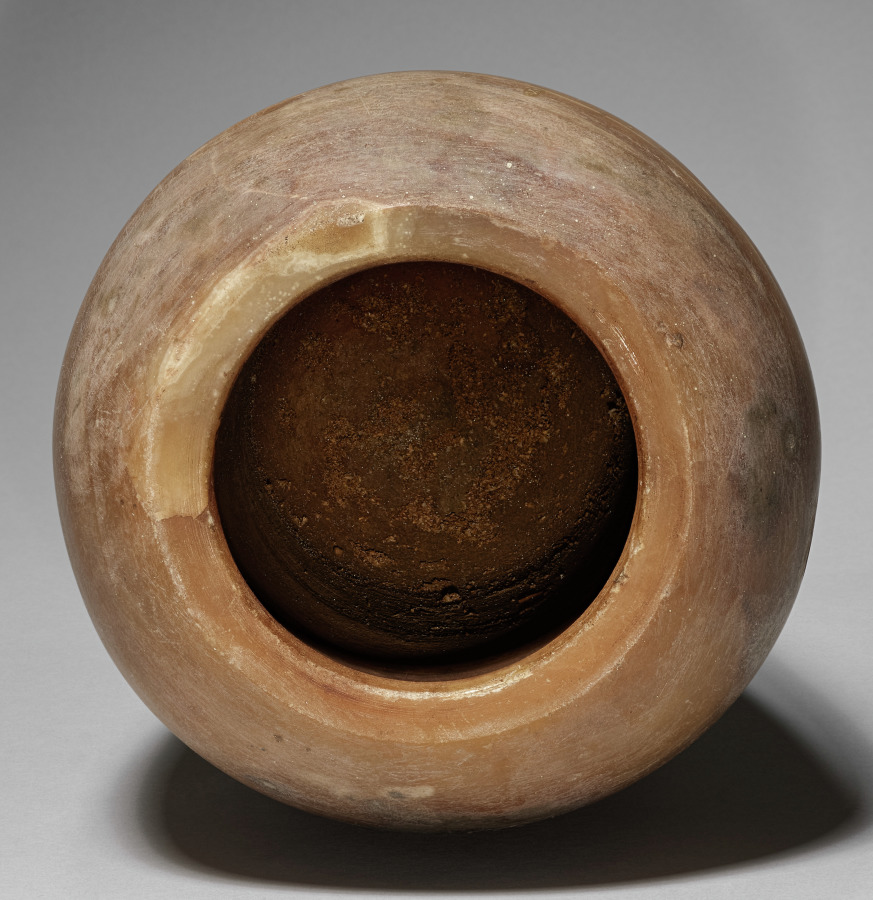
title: Canopic Jar with Baboon's Head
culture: Egypt, Late period (715–332 BCE), Dynasty 26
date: 664–525 BCE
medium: travertine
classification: Funerary Equipment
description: In the process of mummification, the liver, lungs, stomach, and intestines were removed, separately embalmed, and stored in specialized jars known as canopic jars (after a sailor in Greek mythology, who died at the town of Canopus in the Nile Delta and was worshipped there in the form of a human-headed jar). Each organ was identified with one of four funerary deities collectively known as the Sons of Horus: the liver with Imsety (man's head), the lungs with Hapy (baboon's head), the stomach with Duamutef (jackal's head), and the intestines with Qebehsenuef (falcon's head). It was their duty to protect the deceased and restore to him his body parts in the hereafter.